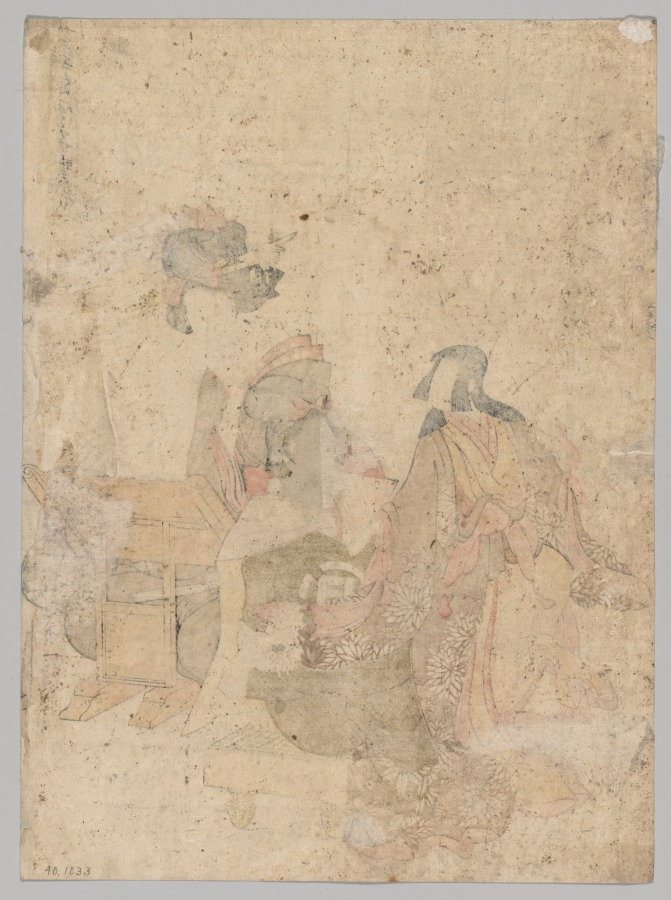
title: Bunraku Puppetry from the series Competition of Precious Children Proud of their Arts, Among Seven Scrolls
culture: Japan, Edo period (1615–1868)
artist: Kitagawa Utamaro II (Japanese, d. 1831?)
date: 1805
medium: color woodblock print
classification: Print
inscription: Signature: Utamaro fude